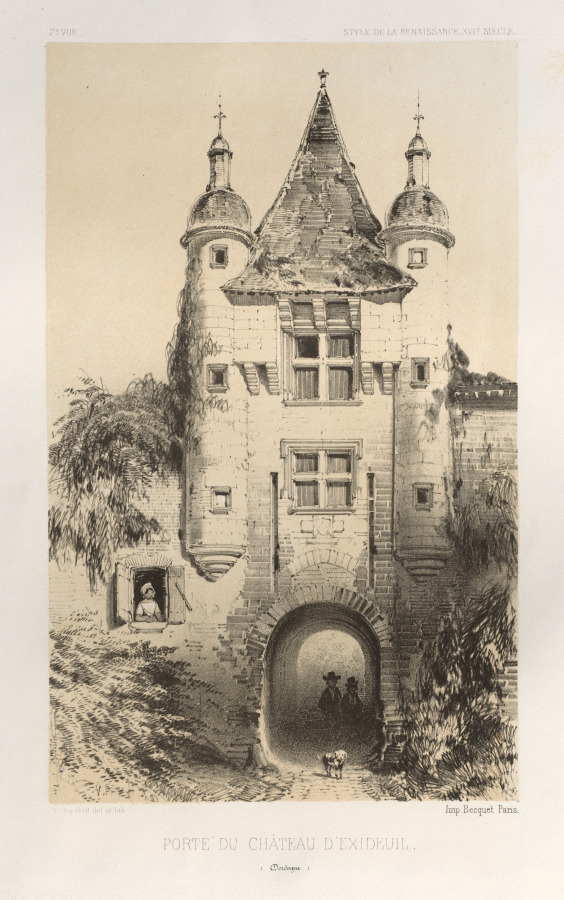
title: Architecture Pittoresque ou Monuments des xveme. Et xvieme. Siecles: Chateaux De France des XV et XVI Siecles: Pl.7, Porte du Chateau d'Exideuil (Dordogne)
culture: France, 19th century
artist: Victor Petit (French, 1817–1874)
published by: Charles Boivin (publisher and editor); Lith de Godard a Paris (printer)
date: 1860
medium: lithograph with tint stone, from portfolio of 100 lithographs with tint stone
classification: Print